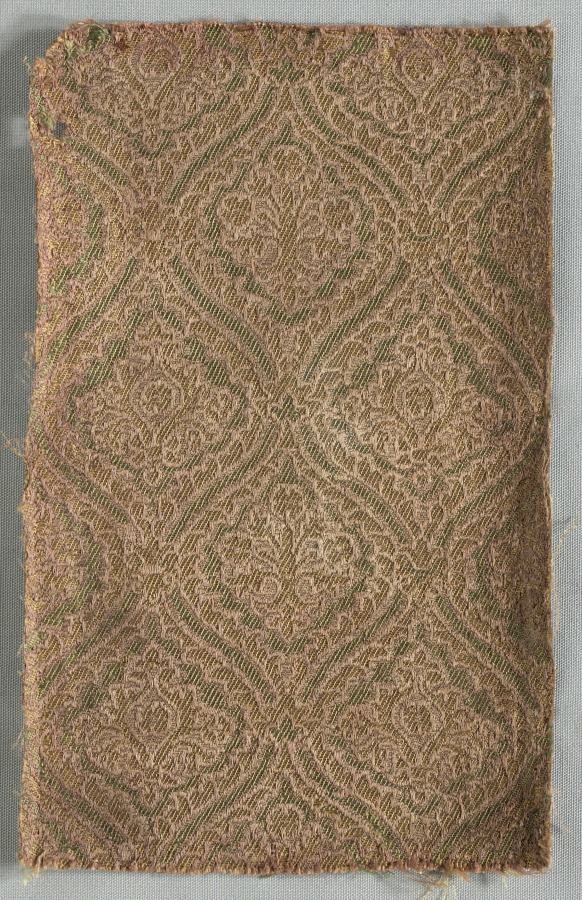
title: Two Brocaded Fragments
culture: Italy, late 16th century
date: late 1500s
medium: lampas weave (?), silk and metal thread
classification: Textile